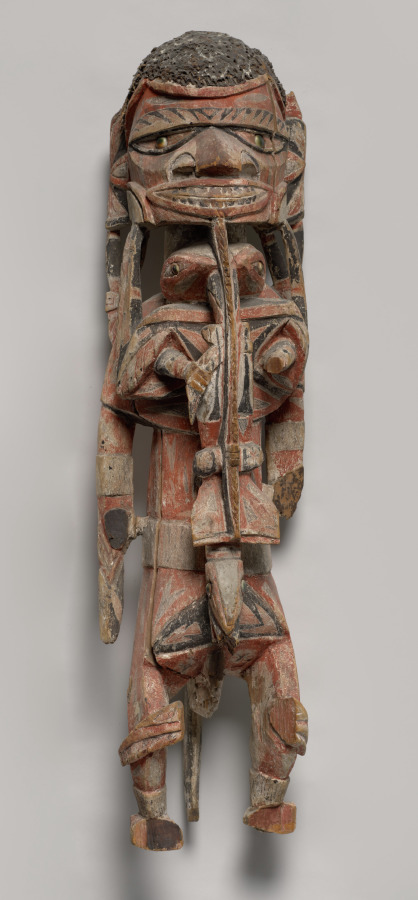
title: Malagan Memorial Festival Pole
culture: Melanesia, New Ireland, 19th century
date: 1800s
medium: painted wood, sea snail opercula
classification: Sculpture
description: At the death of an important individual in New Ireland society, villagers begin preparations for an elaborate funeral (malagan) ceremony. Food is collected for feasts, and artists are commissioned to carve elaborate sculptures and masks. Neighboring groups are invited to the ceremonies, which last for days and include speeches, dancing, music, feasts, and exchanges of goods. The ceremonies climax in the display of the elaborately carved, brightly painted art works. After the guests' departure, the malagan sculptures and masks are discarded, or sometimes stored.